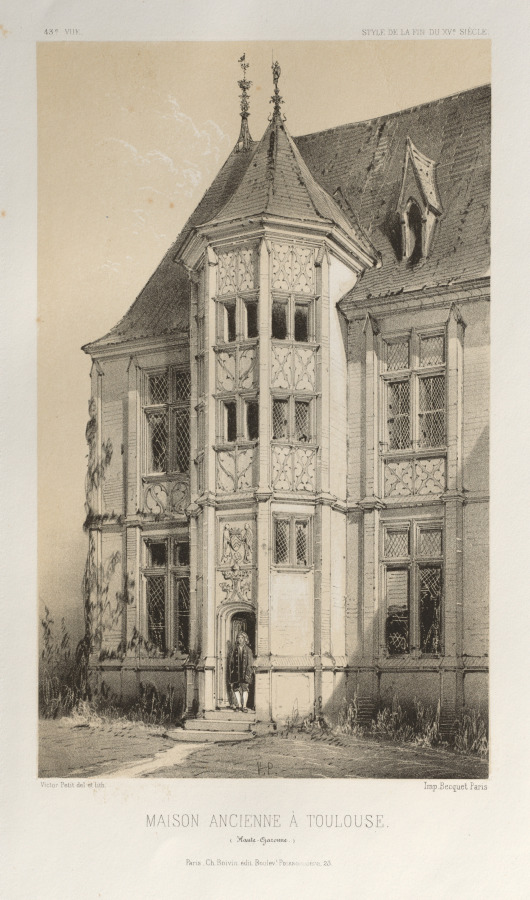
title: Architecture Pittoresque ou Monuments des xveme. Et xvieme. Siecles: Chateaux De France des XV et XVI Siecles: Pl. 43, Maison Ancienne À Toulouse (Haute-Garonne)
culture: France, 19th century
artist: Victor Petit (French, 1817–1874)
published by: Charles Boivin (publisher and editor); Lith de Godard a Paris (printer)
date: 1860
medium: lithograph with tint stone, from portfolio of 100 lithographs with tint stone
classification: Print